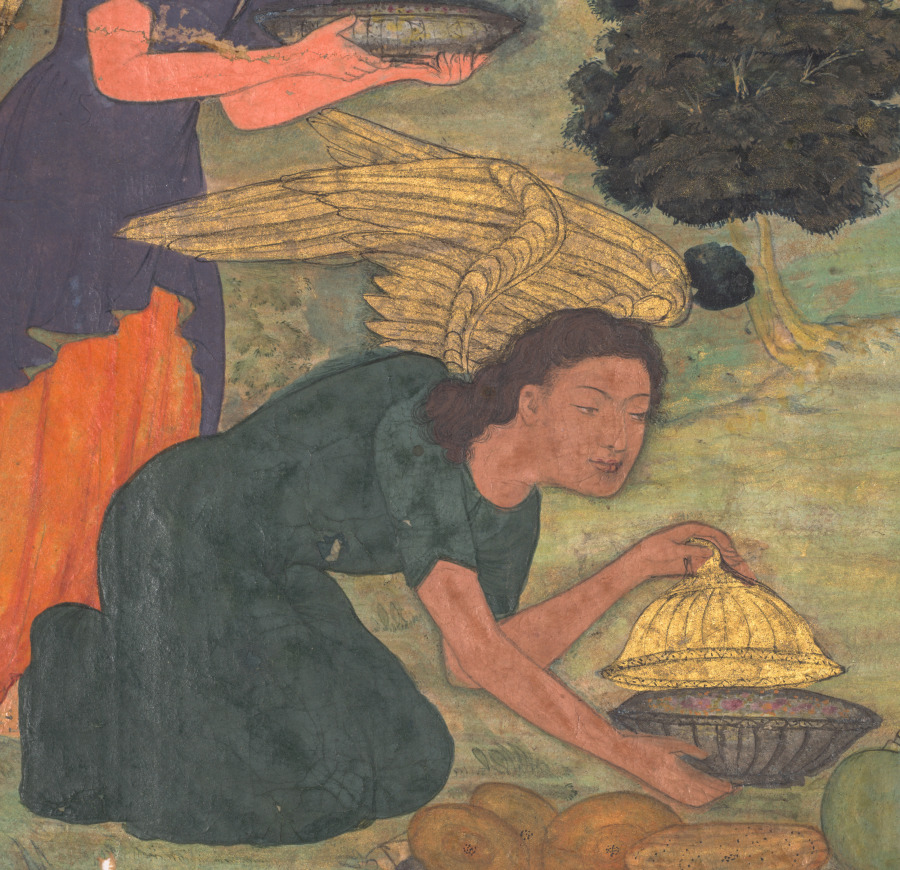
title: Angels bring food to Jesus in the wilderness (folio 55 recto), from a Mirror of Holiness (Mir’at al-quds) of Father Jerome Xavier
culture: Mughal India, Allahabad, made for Prince Salim (1569–1627)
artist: Muhammad Sharif (Indian, active c. 1600)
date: 1602–4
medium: Gum tempera, ink, color, and gold on paper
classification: Manuscript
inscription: Signature of the artist, Muhammad Sharif (Indian, active c. 1600), is written in the tiny pot by Jesus's foot.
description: To end his 40-day fast, five angels brought Jesus refreshments from heaven: breads, melons each with a knife for convenient cutting, fresh leeks, and what appear to be fragrant rice dishes and curries, along with cups of wine. Four of the angels are dressed in robes, and one is clothed only in feathers. After his baptism, Jesus spent 40 days and nights in the desert where he fasted, practiced spiritual exercises, and successfully resisted the temptations of Satan. Many of the rocks in this painting have faces, called grotesques. This page is the only surviving folio from this manuscript that has an artist’s signature, written in the tiny pot by Jesus’s foot.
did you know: The artist has put faces in the rocks, following a Persian convention.